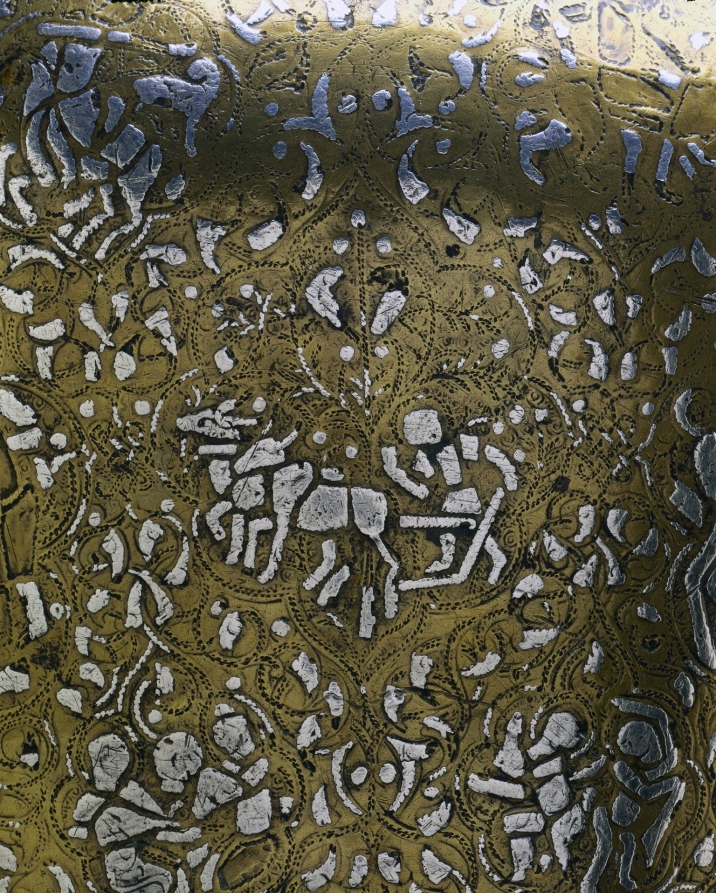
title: Luxury Ewer Extending Good Fortune to the Owner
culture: Iraq, possibly Mosul, Zangid or Artugid Period, 13th Century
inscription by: Ahmad al-Dhaki al-Mawsili (Iraqi, Mosul, active early 1200s?)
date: 1223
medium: brass inlaid with silver; lid and base added later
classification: Metalwork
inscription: Band on the neck (naskh): "Work of Ahmad al-Thaki, the engraver, al-Mawsili, in the year 620 and glory to my owner"; band at the base of the handle (naskh): "Work of Ahmad al-Thaki al-Mawsili"; graffiti of later owners, roughly scratched into the neck of the ewer: "Husayn ibn Qasim"; "Usta al-Muhtasib [?]"; band on the shoulder of the ewer (plaited, animated kufic): "Good luck, and learning, and commanding respect, and prosperity, and pride, and generosity, and faithfulness, and affection, and glory, and survival, and justice, and blessings, and exaltedness, and prosperity, and everlasting peace, and charitable giving."; band on the foot (naskh) [foot is a later addition]; this inscription has not yet been deciphered.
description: This silver inlaid ewer was produced for luxury clientele. The wide band around the body of the vessel displays vignettes of daily and courtly life contained within multilobed medallions. Some of the scenes feature falconry, hunting, dancing, and several groups of musicians. All these scenes are set off against a skillfully executed arabesque background—a pervasive motif in Islamic art characterized by interwoven vegetal and curvilinear elements. An inscription around the ewer’s shoulder extends good fortune, prosperity, and peace to the owner. The ewer is dated 1223 and signed by the master craftsman Ahmad al-Dhaki of Mosul.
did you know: Later owners roughly scratched their names into the neck of the ewer.